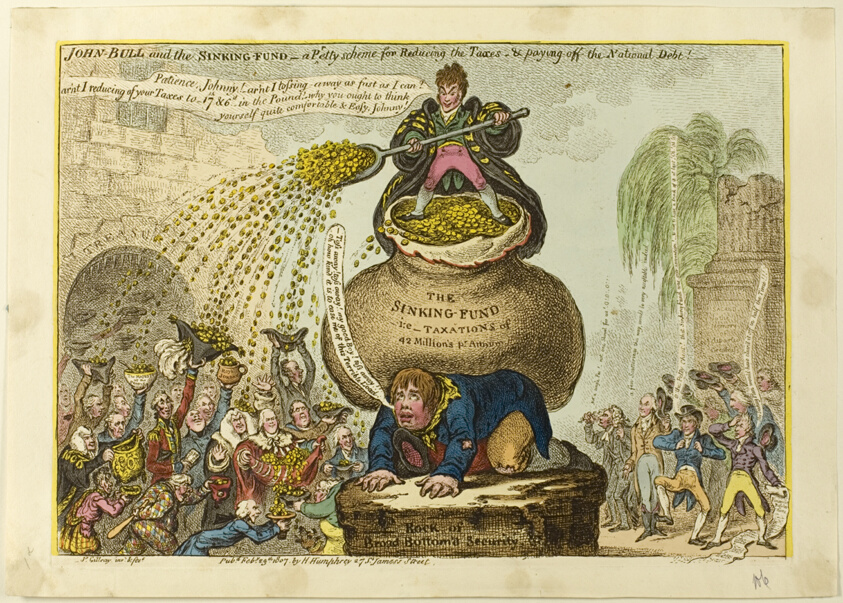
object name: Print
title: John Bull and the Sinking-Fund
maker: James Gillray (English, 1756-1815); published by Hannah Humphrey (English, c. 1745-1818)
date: published February, 1807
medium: Hand-colored etching on paper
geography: England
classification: etching; print; prints and drawing